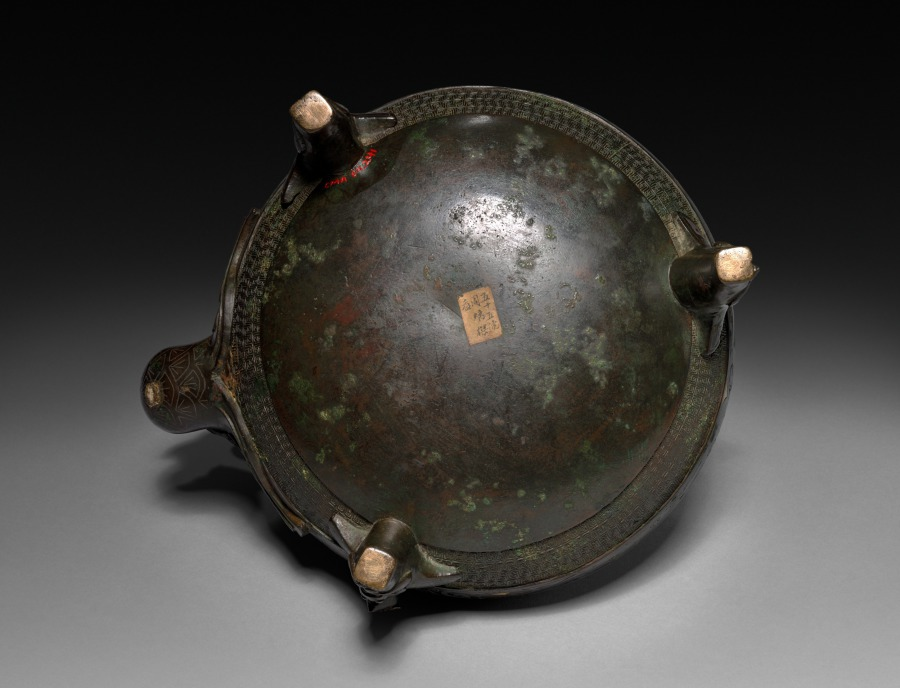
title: Kettle with Handle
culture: China, Qing dynasty (1644-1911) or Republican period (1912-49)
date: 1700s-1800s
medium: bronze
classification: Metalwork